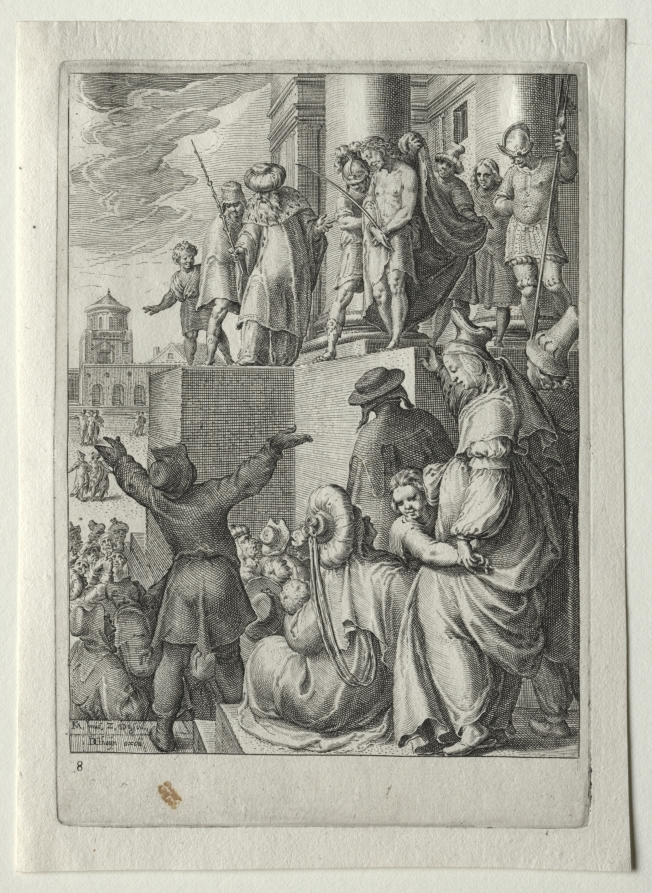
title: Passion Set: Ecce Homo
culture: Netherlands, 16th century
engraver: Zacharias Dolendo (Dutch, 1561–1604)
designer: after Karel van Mander I (Dutch, 1548–1606)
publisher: Jacob de Gheyn II (Netherlandish, 1565–1629)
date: 1596–98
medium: engraving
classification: Print